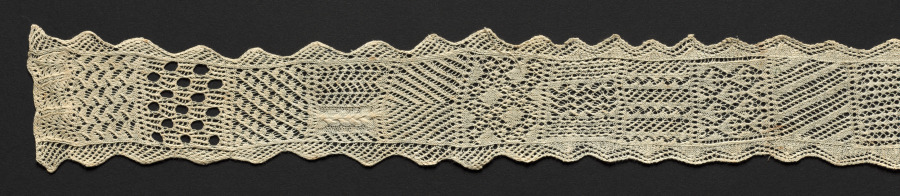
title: Knitted Lace Sampler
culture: Italy, Sienna, 19th century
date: 19th century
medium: knitted linen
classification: Sampler